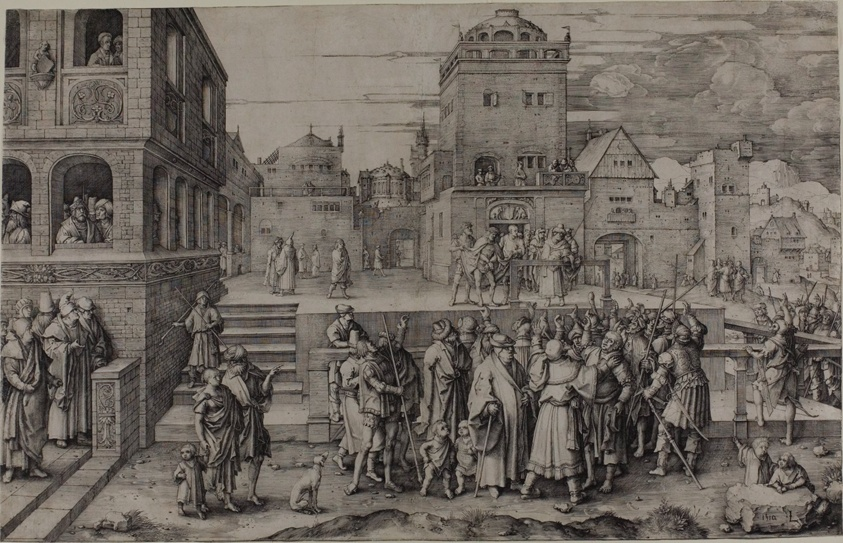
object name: Print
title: The Large Ecce Homo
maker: Lucas van Leyden (Netherlandish, c. 1494-1533)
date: 1510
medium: Engraving in black on ivory laid paper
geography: Netherlands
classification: engraving; print; prints and drawing